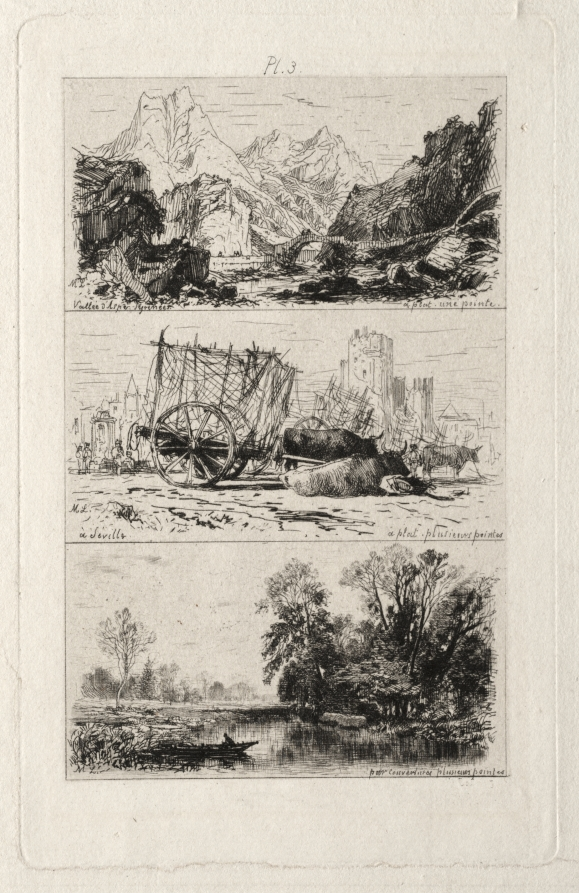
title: From Treatise on Etching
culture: France, 19th century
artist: Maxime Lalanne (French, 1827–1886)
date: 1866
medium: etching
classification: Print